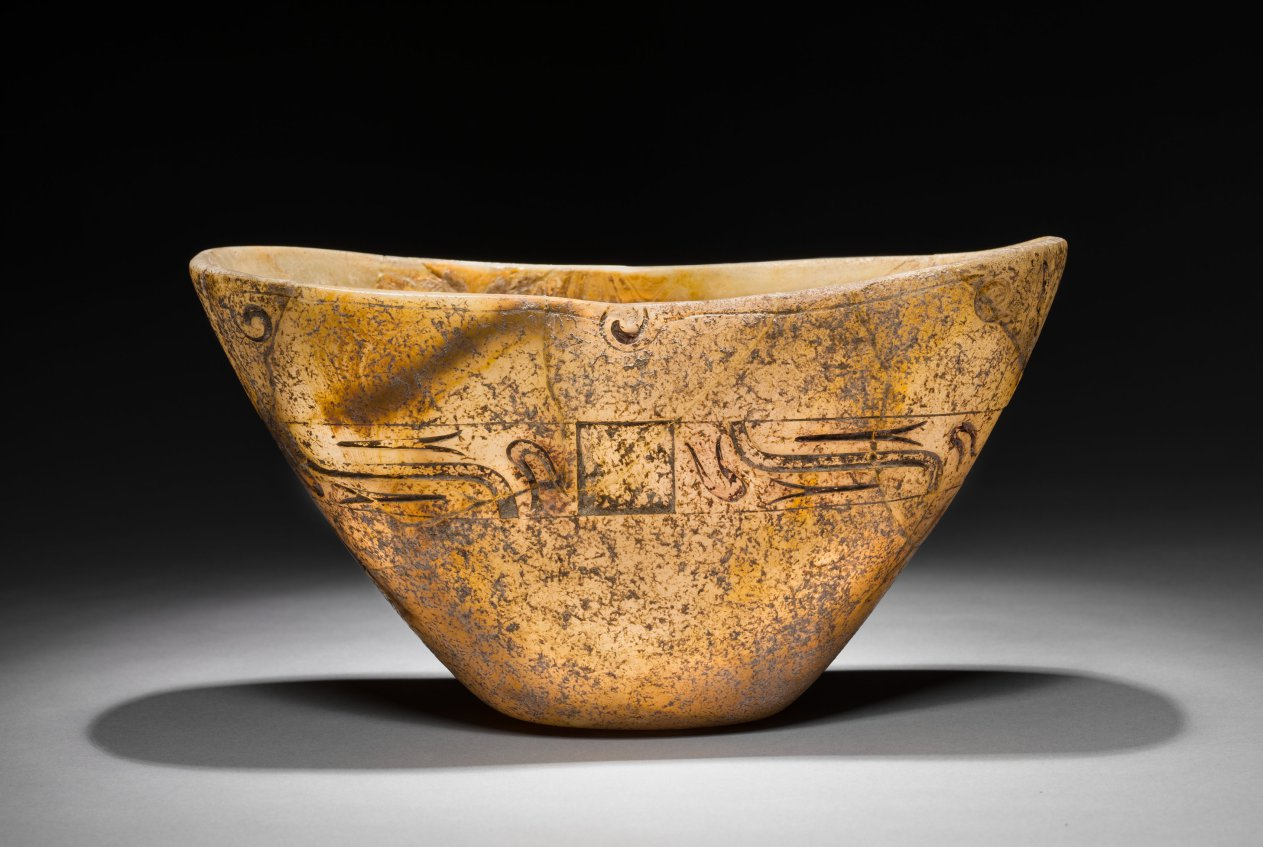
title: Carved Bowl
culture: Mesoamerica, reportedly the Tepecoacuilco River Valley, Guerrero, Olmec style (1200-300 BC), Formative Period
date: 1200–300 BCE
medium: stone (travertine)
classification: Stone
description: Containers made of translucent white travertine, known among the later Aztecs as tecali, are rare in Olmec artistic production. The shape of this elegant example, its rim pinched inward at the center, may refer to a squash. The meaning of the deeply carved abstract motifs, which retain traces of red pigment, is unknown. The bowl is said to have been found in a burial cache that included an Olmec figurine, a hematite mirror, and jade ornaments in Guerrero, Mexico.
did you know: Travertine is a type of limestone deposit commonly found in caves and hot springs.